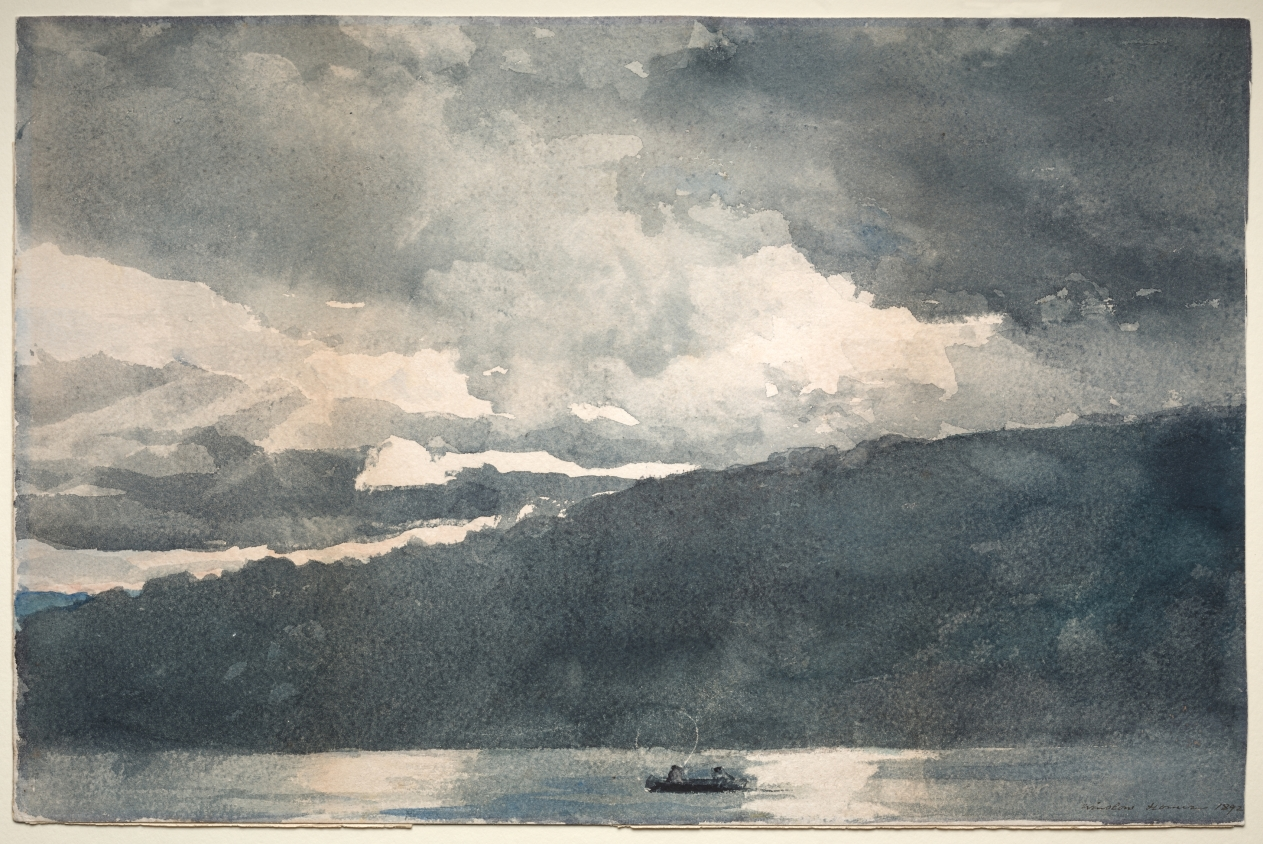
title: Mink Lake, Adirondacks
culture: America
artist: Winslow Homer (American, 1836–1910)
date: 1892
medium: watercolor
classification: Drawing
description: Mink Pond was Homer’s favorite haunt in the Adirondacks. With a subtle range of smoky blue washes, the artist conveyed the grandeur of the mountains and a stormy sky towering above a diminutive canoe with a casting fisherman. Small breaks of brightness provide moments of relief in the monochromatic tonality of the whole.